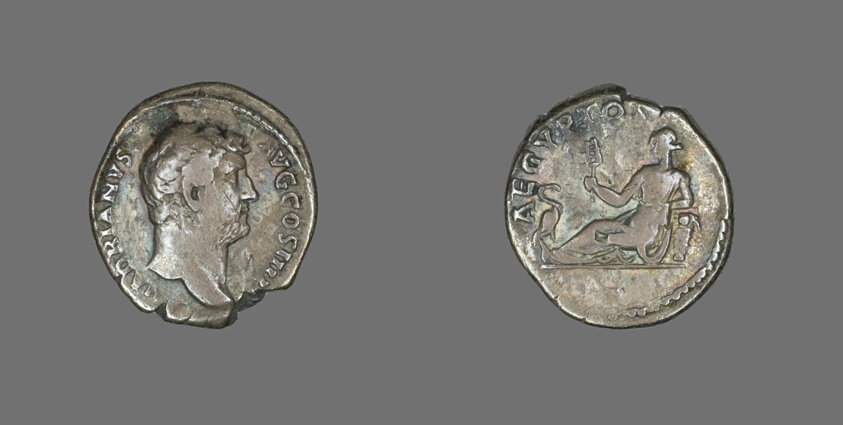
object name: Coin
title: Denarius (Coin) Portraying Emperor Hadrian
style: roman (ancient, style or period)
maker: Roman, minted in Rome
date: 130-133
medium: Silver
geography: Roman Empire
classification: coin; ancient art